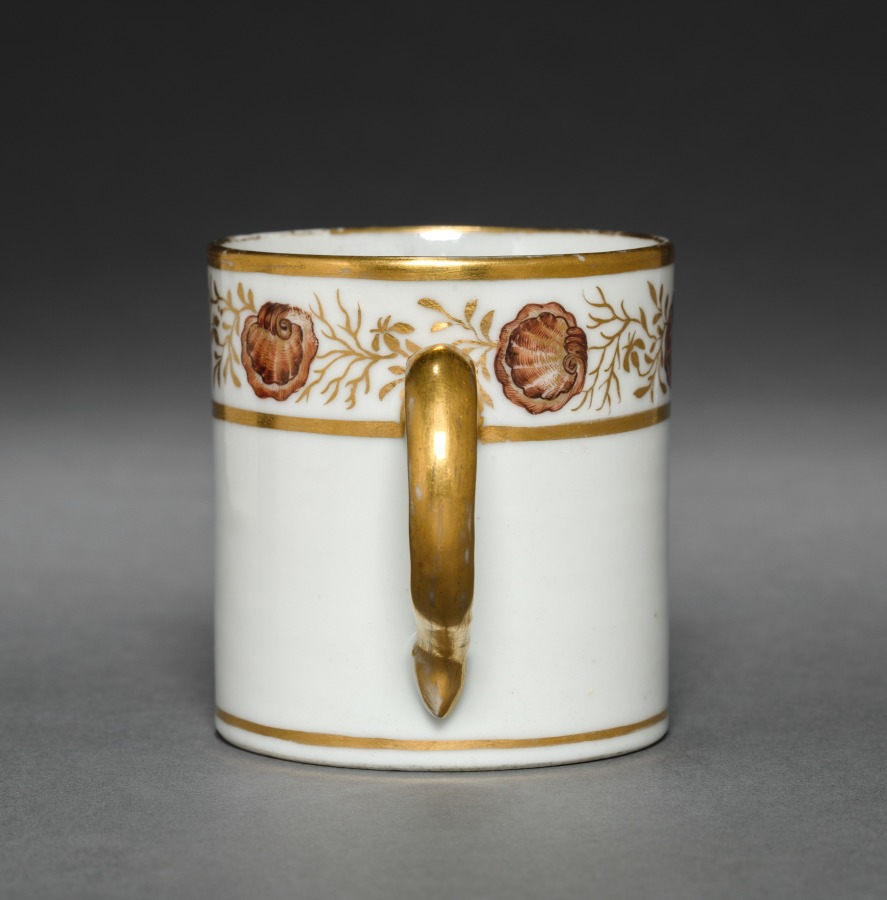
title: Cup from Oliver Wolcott, Jr. Tea Service (4 of 6)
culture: Chinese Export porcelain, late 18th-early 19th century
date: 1785–1805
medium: porcelain, sepia enamel, gold leaf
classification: Ceramic